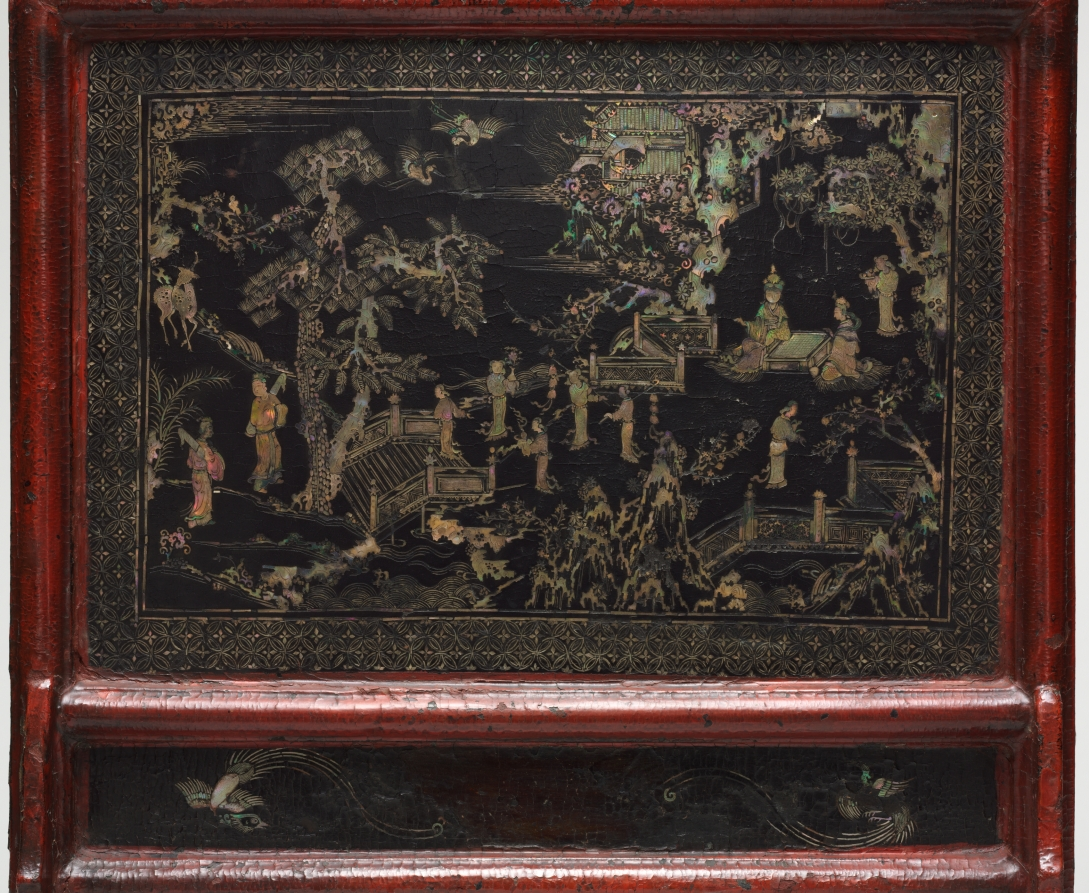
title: Table Screen: The Peach Blossom Spring, Land of the Immortals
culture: China, Yuan dynasty (1271-1368)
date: 1300s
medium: lacquer on wood with mother-of-pearl inlay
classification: Lacquer